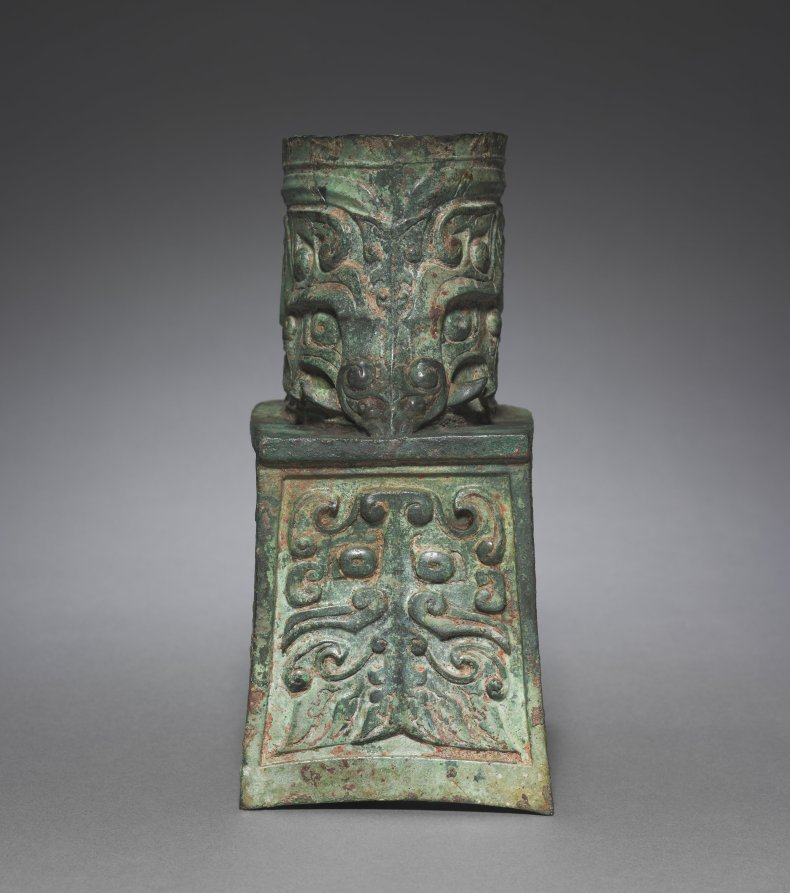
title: Chariot Axle Cuff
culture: China, Henan province, Western Zhou dynasty (c. 1046–771 BCE)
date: c. 1046–771 BCE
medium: bronze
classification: Metalwork